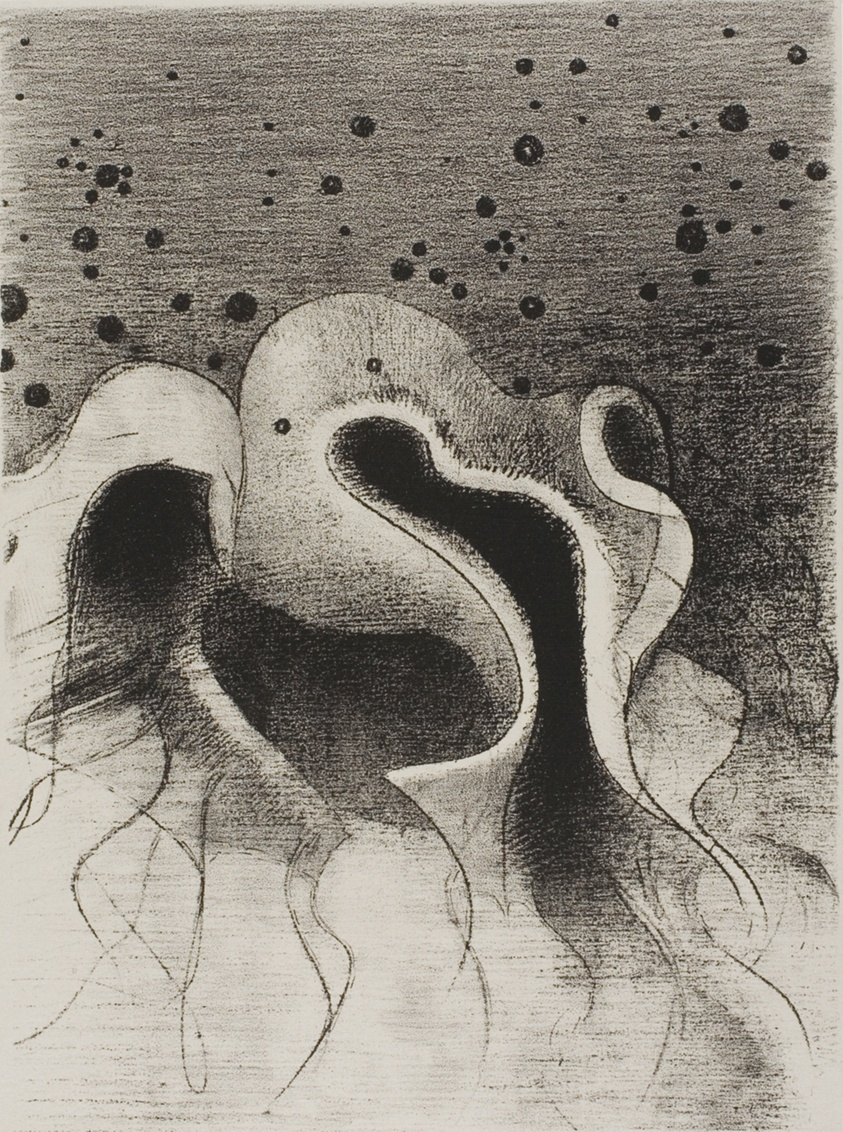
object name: Print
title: The Beasts of the Sea, Round Like Leather Bottles, plate 22 of 24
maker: Odilon Redon (French, 1840-1916)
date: 1896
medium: Lithograph in black on light gray China paper laid down on ivory wove paper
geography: France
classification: lithograph; print; prints and drawing; paper